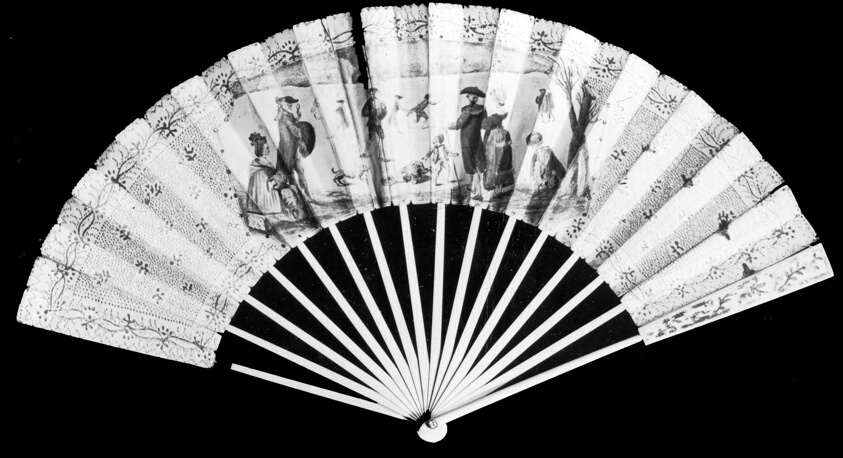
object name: Costume and Accessories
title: Fan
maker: France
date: 1775/1800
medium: Plain ivory sticks and silver decorated guards; engraved paper mount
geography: France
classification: textile; fan - paper; costume accessory - folding fan; costume